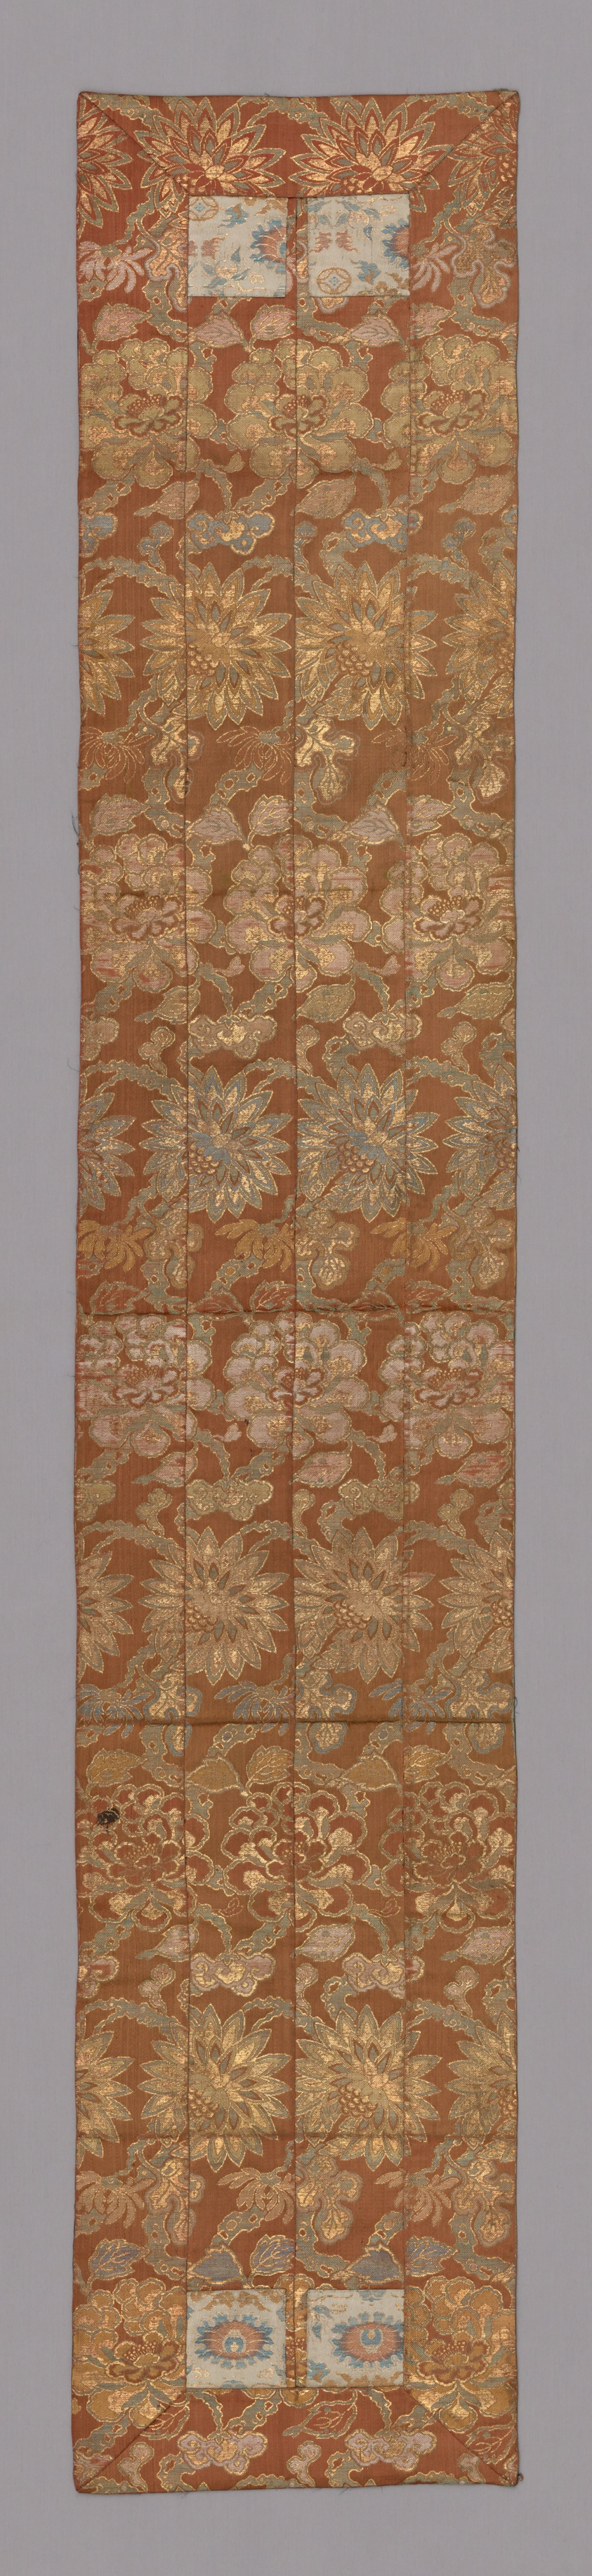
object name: Textile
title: Ôhi (Stole)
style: asian, Japanism, taisho, meiji, late edo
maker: Japan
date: Edo period (1615–1868), 1775/1825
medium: Fancy compound satin in silk threads and golden paper strips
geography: Japan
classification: textile; silk; costume; asian art; weaving